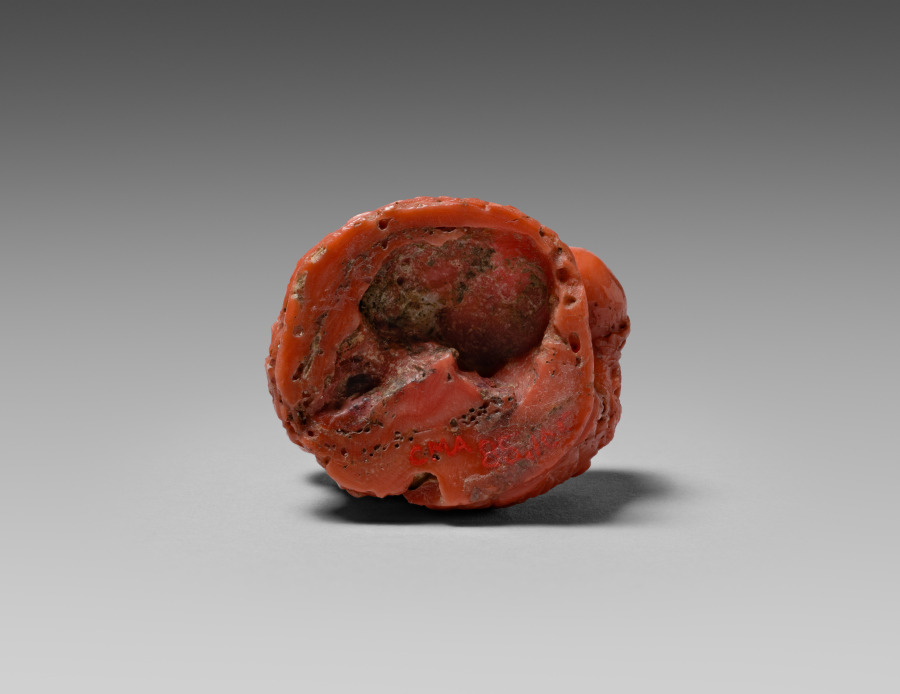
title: Sword Hilt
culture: Pakistan, Gandhara, Kushan period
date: c. 100s–200s CE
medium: coral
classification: Sculpture